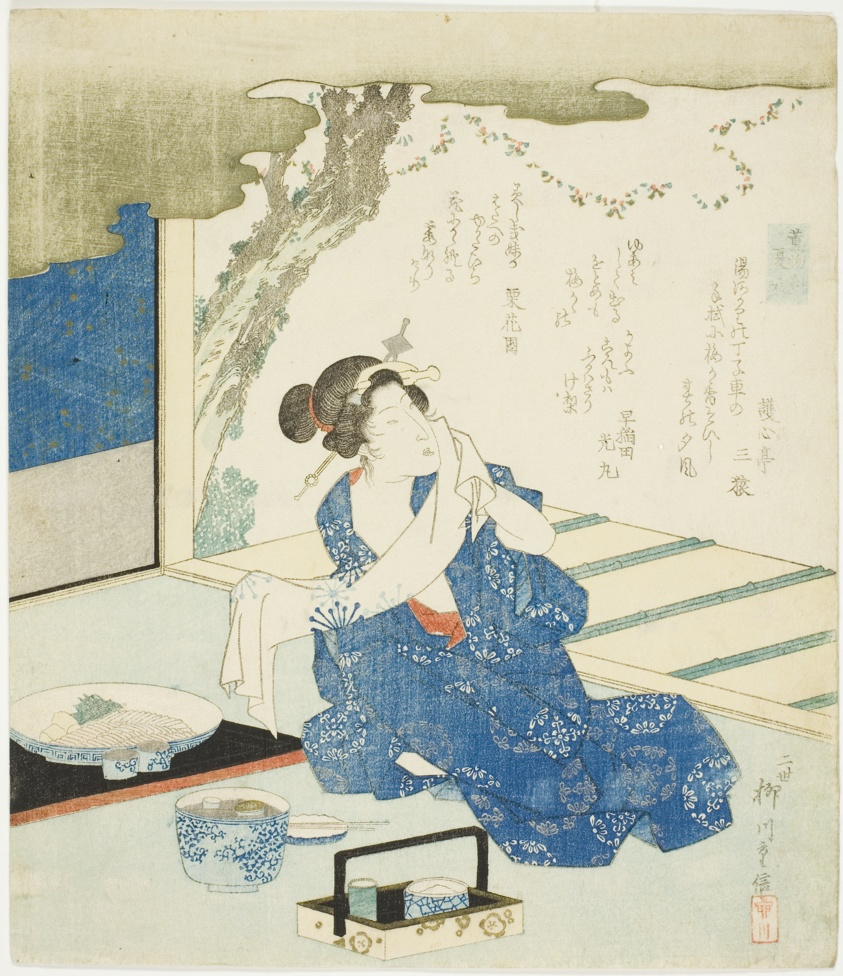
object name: Print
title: Summer Robes (Natsugoromo), from the series "A Comparison of Incense (Takimono awase)"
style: Japanese (culture or style)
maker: Yanagawa Shigenobu II (Japanese, active c. 1820-late 1850s)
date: c. 1822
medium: Color woodblock print; shikishiban, surimono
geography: Japan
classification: woodblock print; print; asian art